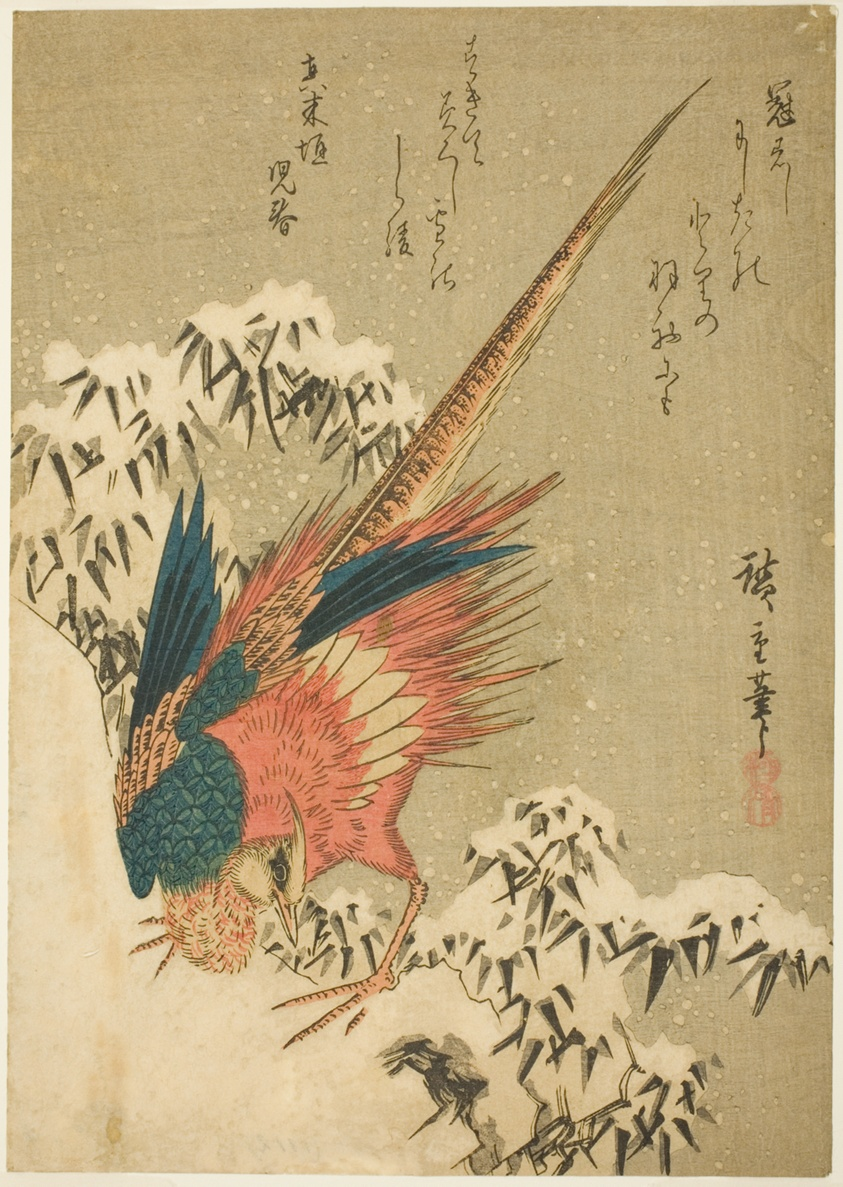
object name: Print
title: A Golden Pheasant amid Snow-Covered Bamboo on a Steep Hillside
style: Japanese (culture or style)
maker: Utagawa Hiroshige 歌川 広重; Japanese, 1797–1858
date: c. 1840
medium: Color woodblock print; chuban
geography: Japan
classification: woodblock print; print; asian art